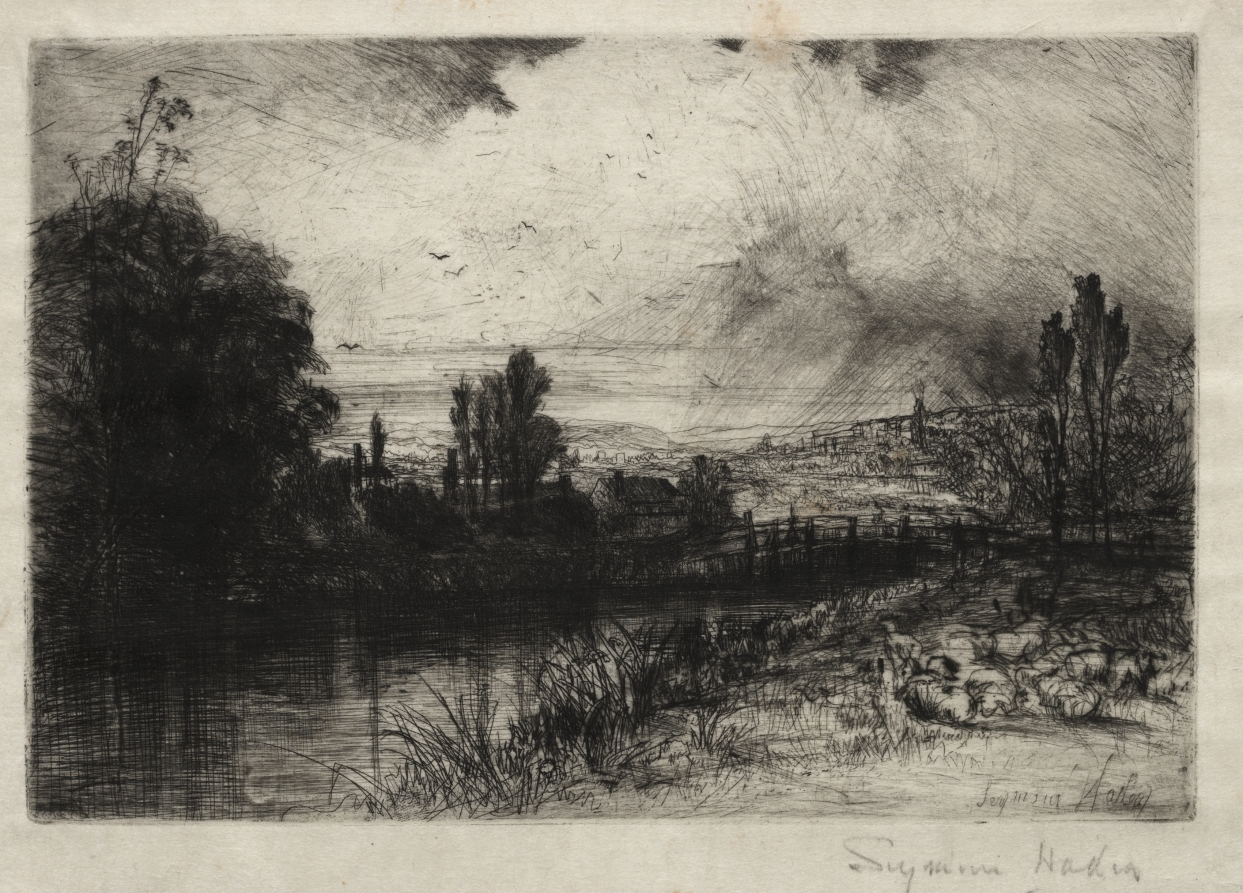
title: On the Test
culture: England, 19th century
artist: Francis Seymour Haden (British, 1818–1910)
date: 1859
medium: etching and drypoint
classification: Print